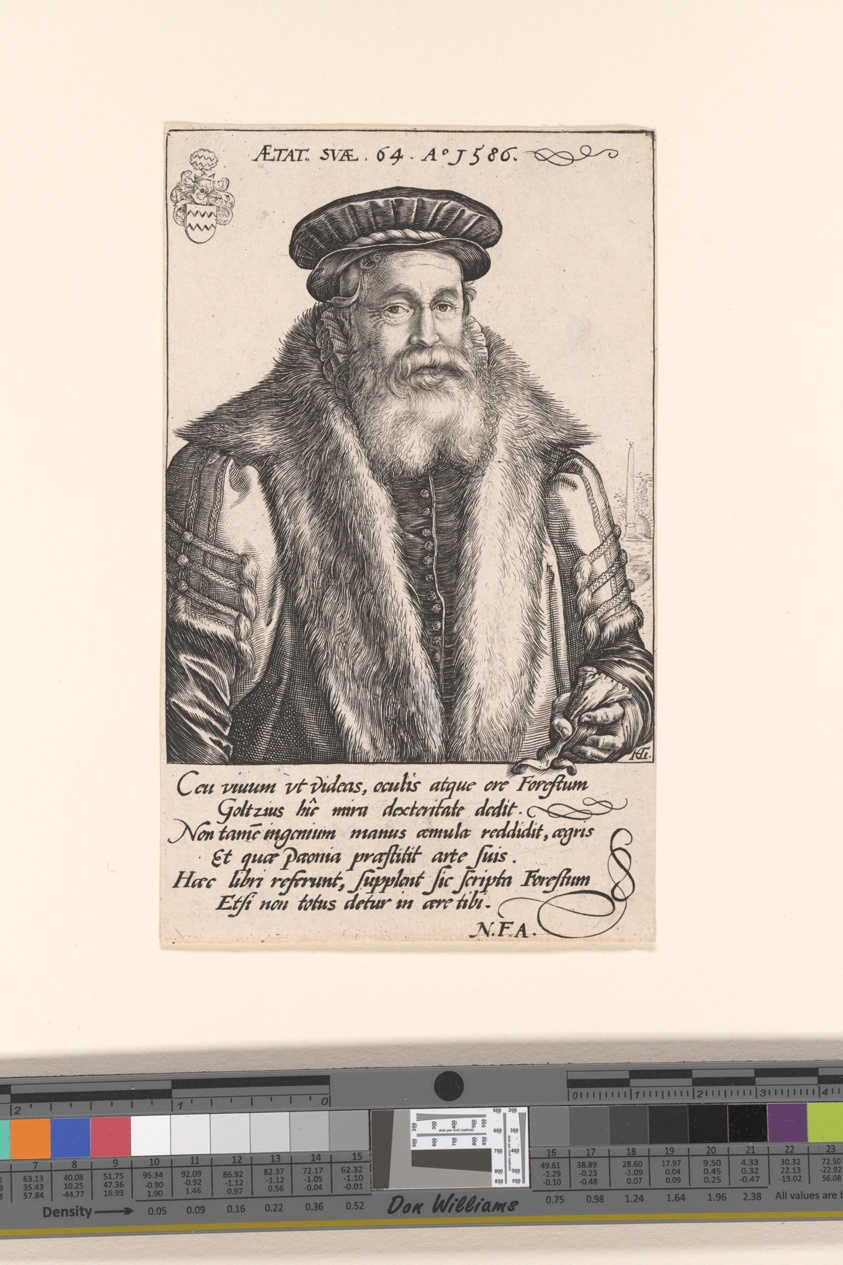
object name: Print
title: Pieter van Foreest (Petrus Forestus)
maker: Hendrick Goltzius (Dutch, 1558–1617)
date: 1586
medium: Engraving on paper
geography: Netherlands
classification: engraving; paper; print; prints and drawing